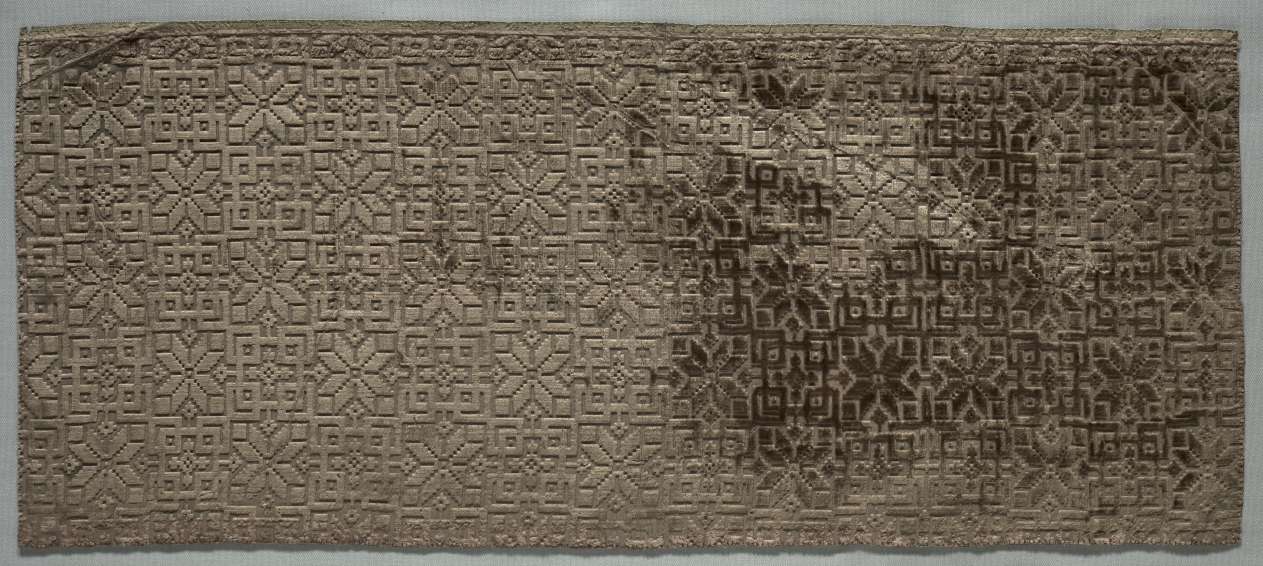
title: Textile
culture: Italy, early 17th century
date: early 1600s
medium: velvet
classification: Velvet